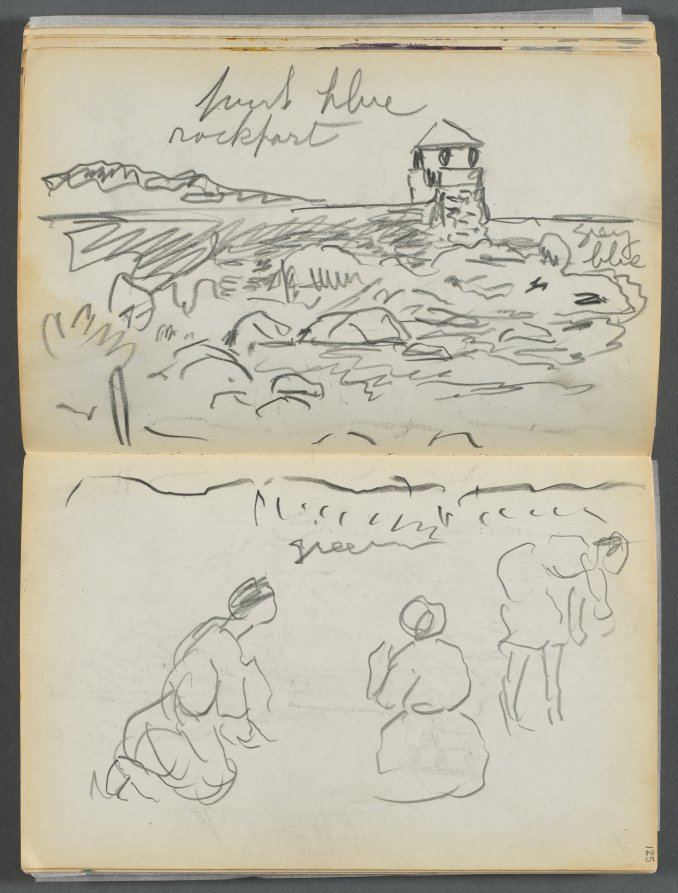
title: Sketchbook- The Granite Shore Hotel, Rockport, page 124 & 125: Rockport Lighthouse and Figures on Shore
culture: America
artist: Maurice Prendergast (American, born Newfoundland [now Canada], 1858–1924)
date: 1905–10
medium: graphite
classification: Bound Volume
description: This sketchbook contains 72 pages of pencil drawings and 9 watercolors of Cape Ann. On the inside of the cover Prendergast wrote the address of the Granite Shore Hotel in Rockport, Massachusetts.